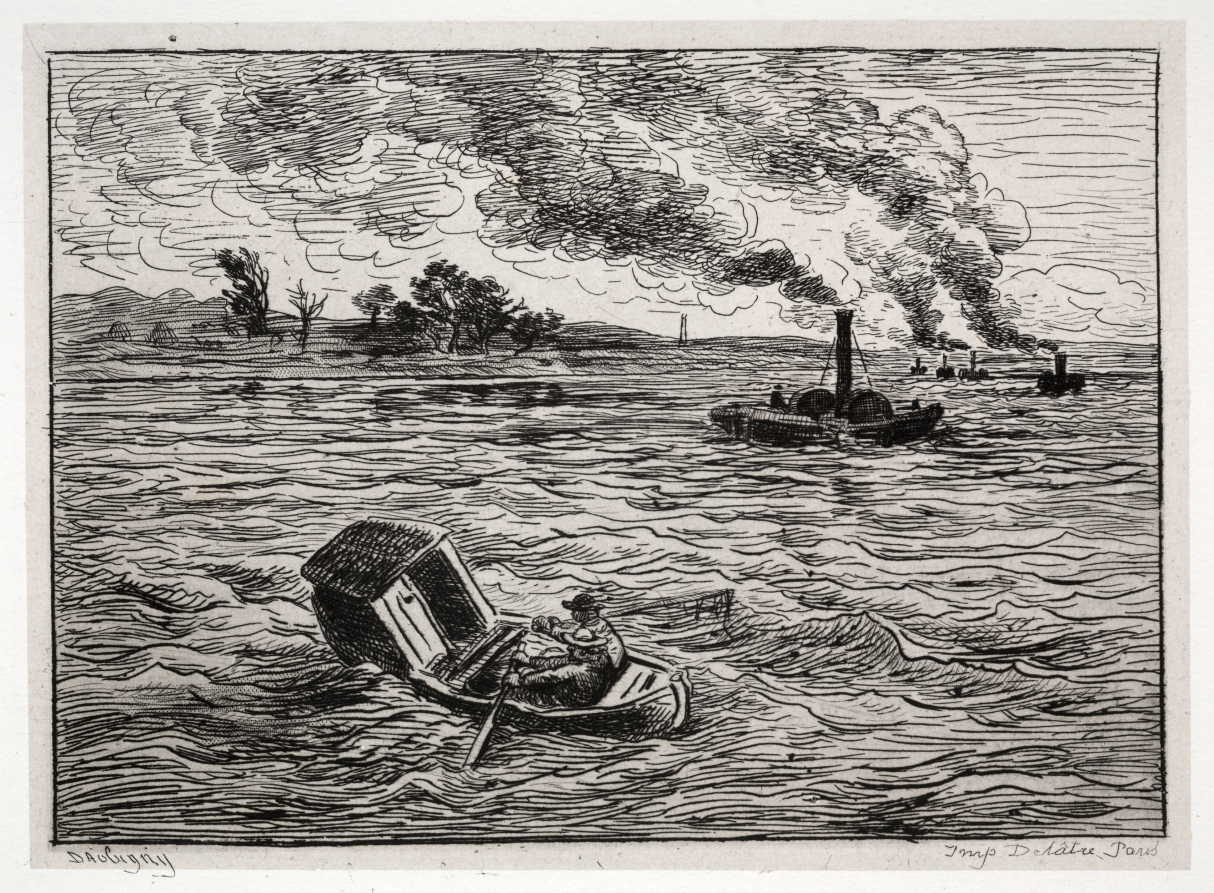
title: The Boat Trip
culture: France, 19th century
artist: Charles François Daubigny (French, 1817–1878)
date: 1861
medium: 16 etchings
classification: Portfolio